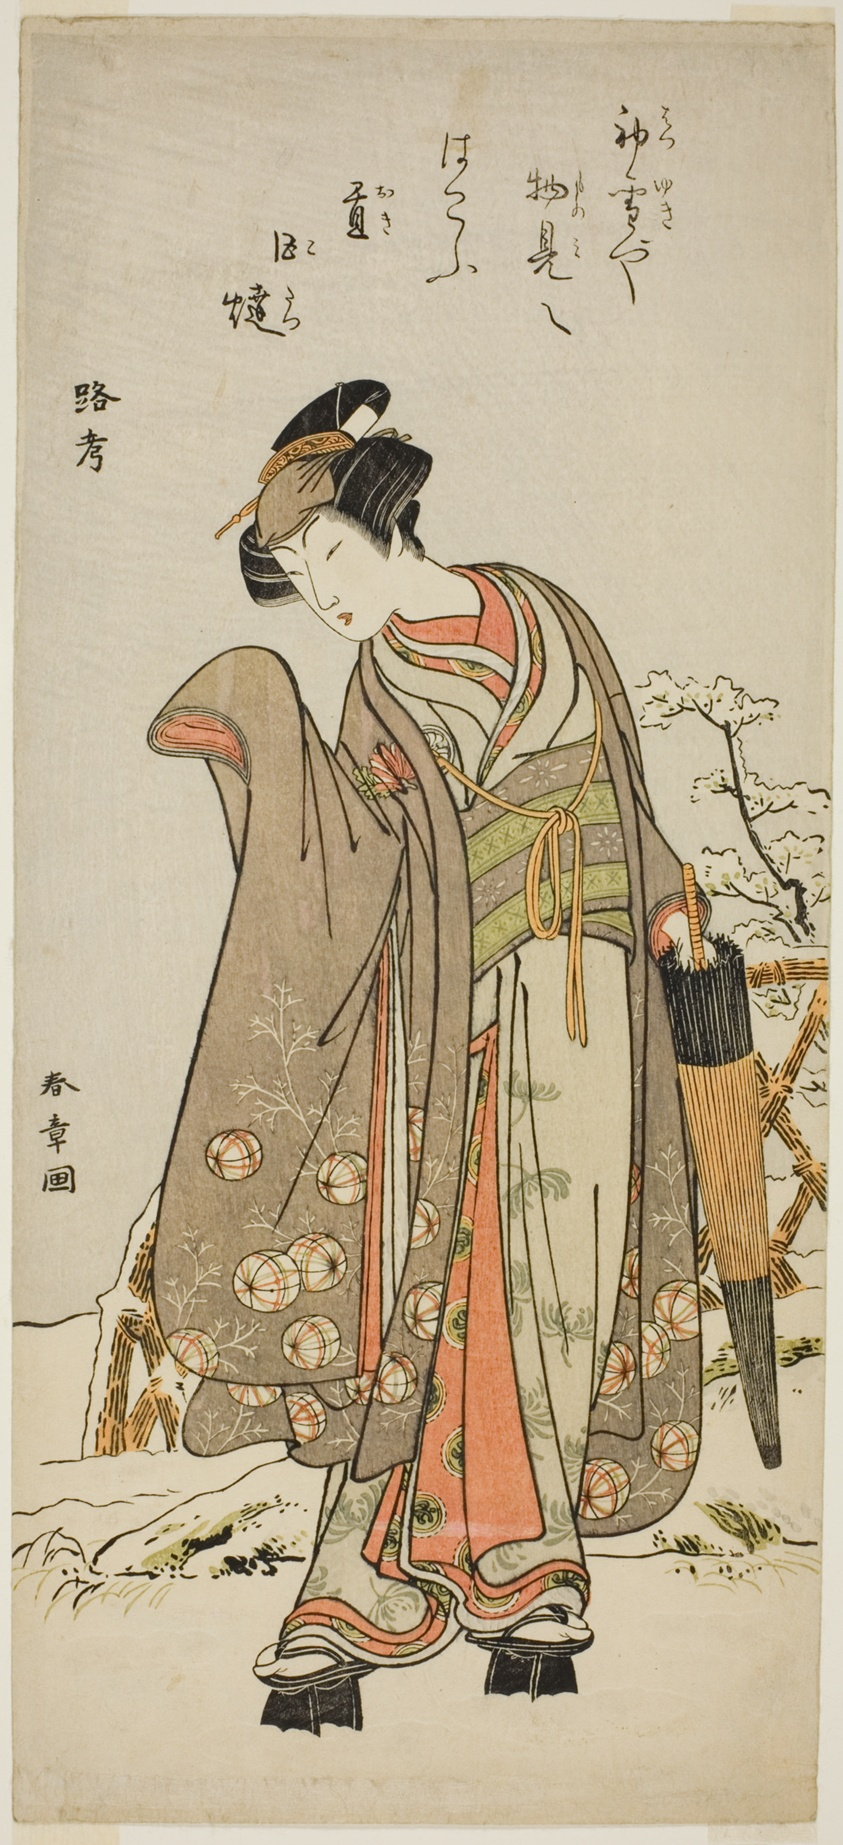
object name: Print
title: The Actor Segawa Kikunojo III in Private Life, Standing in a Snow-Covered Garden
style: Japanese (culture or style)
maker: Katsukawa Shunsho 勝川 春章; Japanese, 1726-1792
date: c. 1775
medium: Color woodblock print; large hosoban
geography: Japan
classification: woodblock print; print; asian art